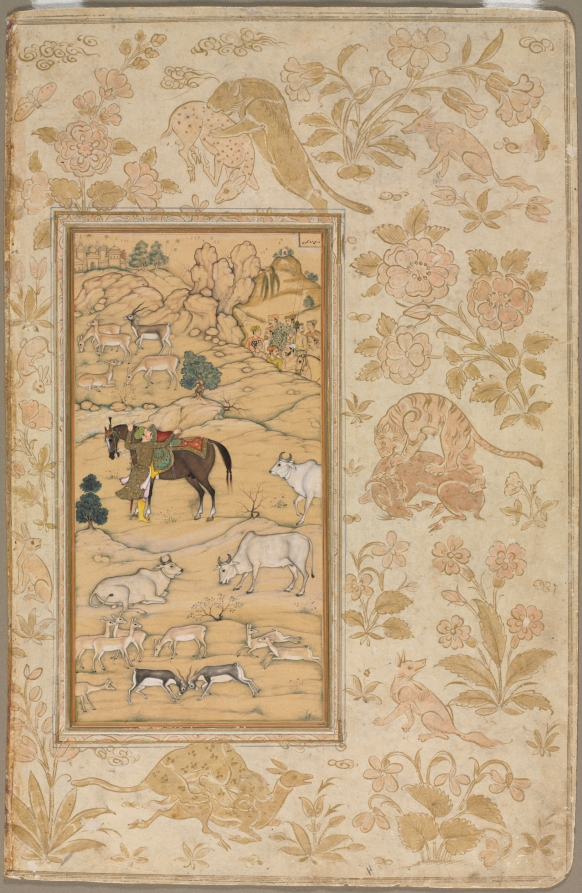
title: Akbar Mounting his Horse; page from the Chester Beatty Akbar Nama (History of Akbar)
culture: India, Mughal school, 17th century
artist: attributed to Sur Das Gujarati (Indian, active 16th century)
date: 1605–07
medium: Gum tempera and ink on paper; Nim qalam drawing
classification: Painting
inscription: recto, upper right in Persian: "Wa zahi daulatmandi"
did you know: In nim qalam drawings, literally "half pen" in Persian, most of the composition is done with monochrome washes, with only a few areas brightly colored or embellished with gold.